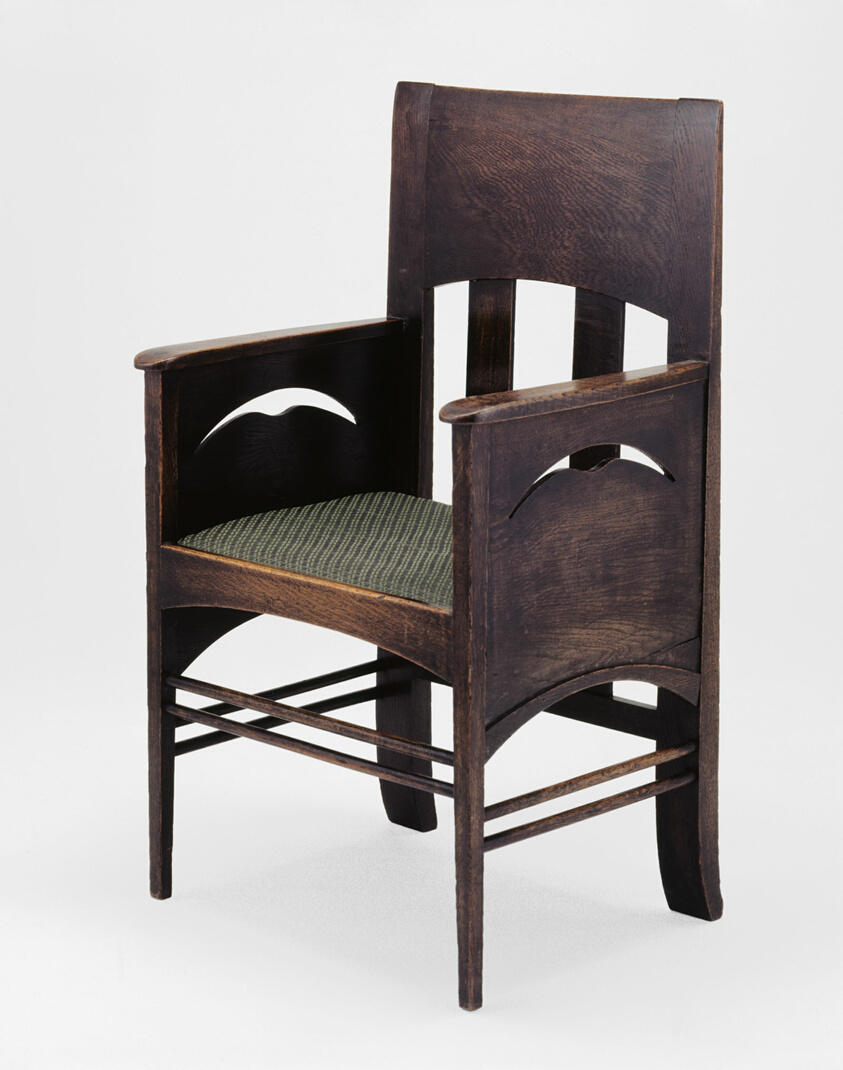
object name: Furniture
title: Armchair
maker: Designed by Charles Rennie Mackintosh (Scottish, 1868-1928); Scotland, Glasgow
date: 1897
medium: Stained oak with modern horsehair upholstery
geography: Scotland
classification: seating; furniture; european decorative arts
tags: furniture